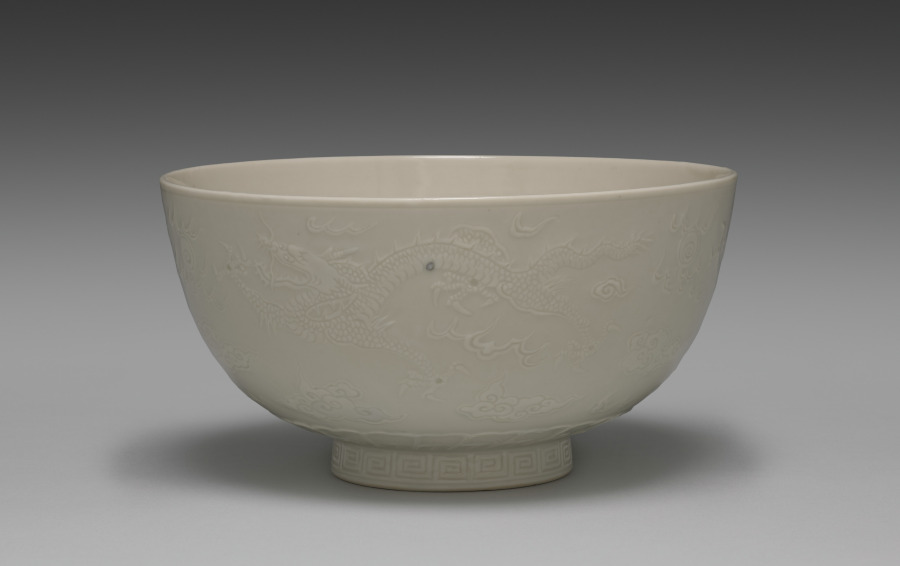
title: Bowl with Dragons Chasing Flaming Jewels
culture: Japan, Meiji period (1868–1912) to Taishō period (1912–26)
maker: Seifū Yohei III (Japanese, 1851–1914)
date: 1893–97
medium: Porcelain with molded and carved design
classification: Ceramic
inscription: 大日本清風造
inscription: 清風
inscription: 清風與平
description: The decoration of this large bowl, described as a donburi on one side of its box, is executed entirely in molded and carved relief under a creamy, pink-tinged translucent glaze. The main motif is a pair of four-clawed dragons pursuing flaming jewels. As is standard for this design, the beasts are surrounded by wisps of cloud, and a foliate pattern runs around the bottom of the basin. A geometric pattern circles the exterior of the footring. The white-on-white design makes the bowl subtle and elegant.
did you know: Kyoto-based Japanese ceramist Seifū Yohei III (1851–1914) admired the glaze colors found on Chinese porcelain and tried to replicate them through intensive experimentation.